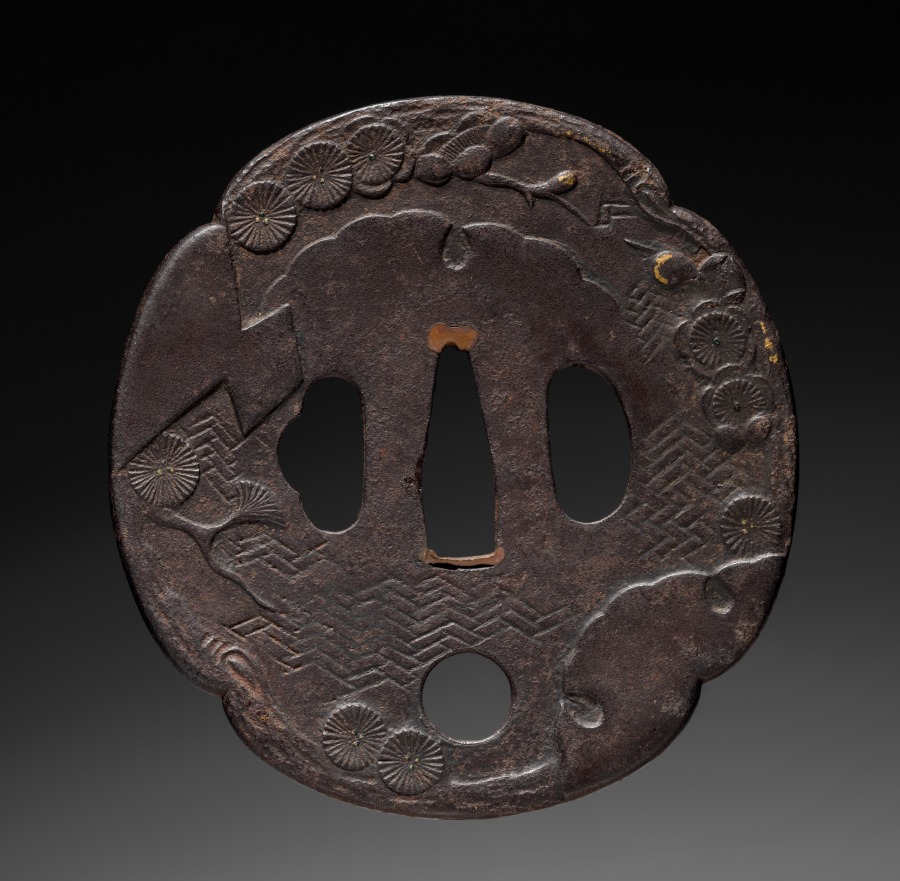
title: Sword Guard (Tsuba)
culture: Japan, possibly Edo period (1615-1868)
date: c. 1615–1868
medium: iron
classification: Arms and Armor